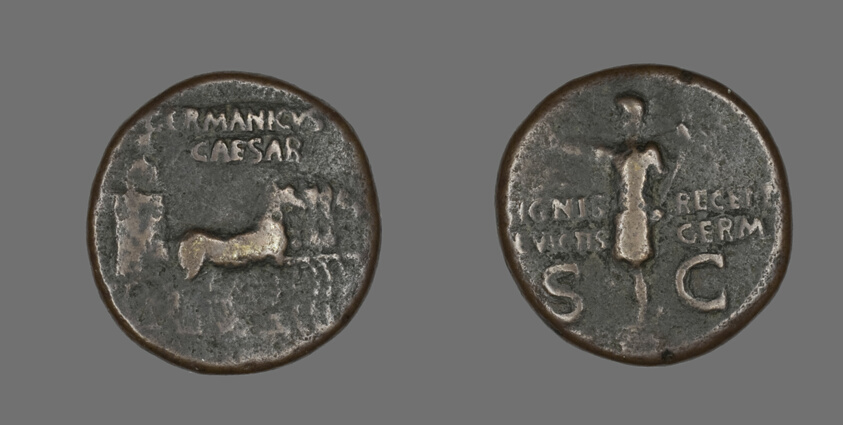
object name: Coin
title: Dupondius (Coin) Portraying Germanicus Caesar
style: roman (ancient, style or period), ancient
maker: Roman, minted in Rome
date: 15 BCE-19 CE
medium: Bronze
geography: Rome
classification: coin; ancient art